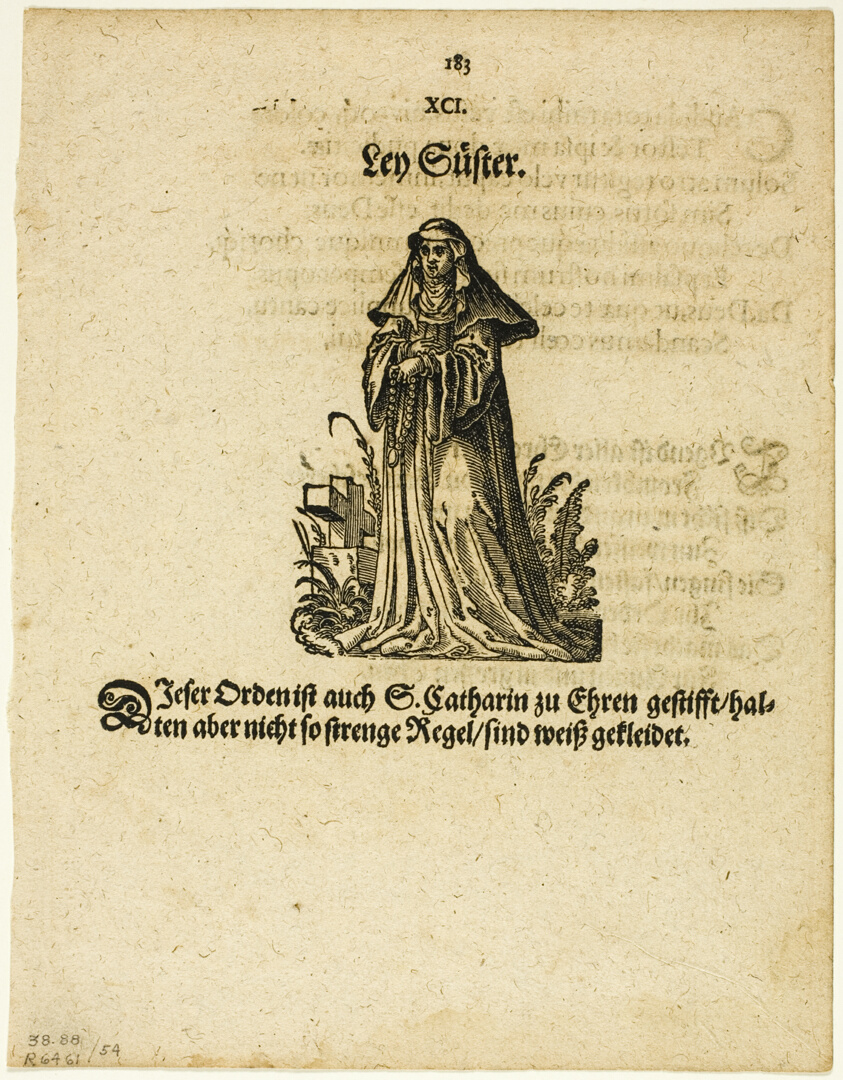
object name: Print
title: Ley Süster (Lay Sister) from Ständ und Orden, plate 54 from Woodcuts from Books of the XVI Century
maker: Jost Amman (Swiss, 1539-1591); assembled by Max Geisberg (Swiss, 1875-1943)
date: n.d., assembled into portfolio 1937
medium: Woodcut on paper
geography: Switzerland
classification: woodcut; print; prints and drawing